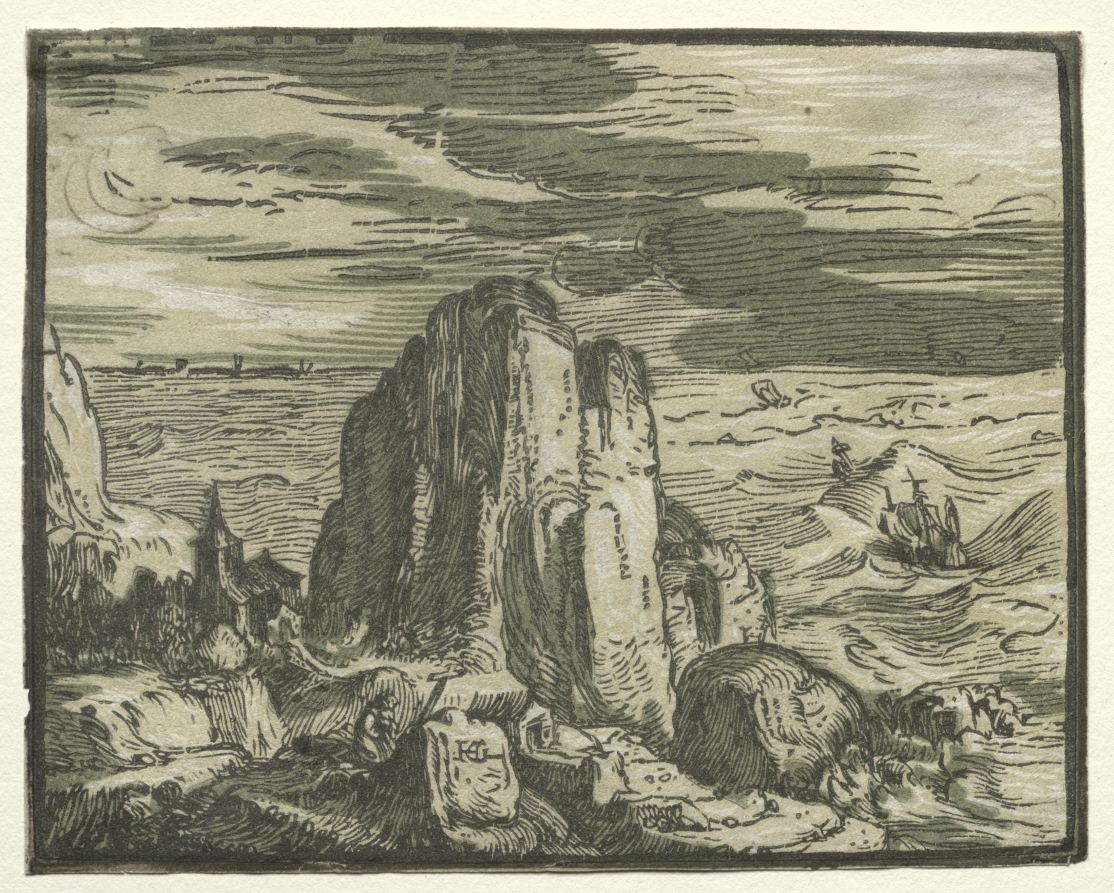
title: Four Small Landscapes: No. 4, Cliff on the Seashore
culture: Netherlands, 16th century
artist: Hendrick Goltzius (Dutch, 1558–1617)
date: c. 1600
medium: chiaroscuro woodcut (lineblock and two toneblocks, light and dark green)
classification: Print